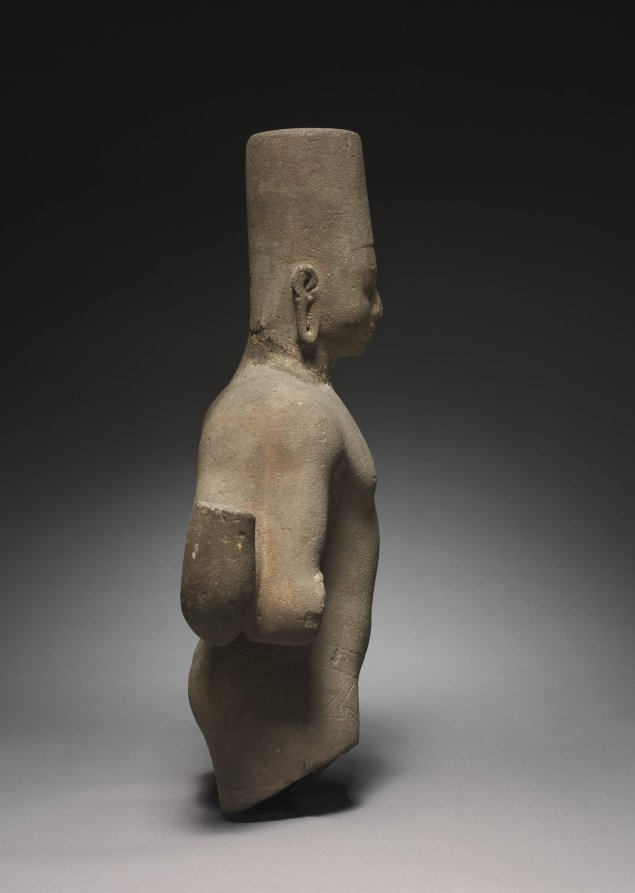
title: Vishnu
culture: Cambodia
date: 650–700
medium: sandstone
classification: Sculpture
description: Vishnu has the features of royalty, indicated by the high mitre-like crown with the flat top, distinctive to types made at the site of Prasat Andet. His status as a god, greater than any earthly king, is indicated by the four arms, traces of which are still visible. The sensitive rendering of the eyes and slight smile are characteristics of Cambodian sculpture, and during this early period, the form of the body reveals some relatively naturalistic musculature and treatment of the garments. He wears the Southeast Asian lower garment called sampot, around which his upper garment is loosely tied. It is Vishnu who incarnates himself into the world in avatars, including Krishna and the boar Varaha. Here we see his iconic form as Vishnu himself.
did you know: The deity is four-armed with the arms running parallel from the shoulders and then bifurcating at the elbows.